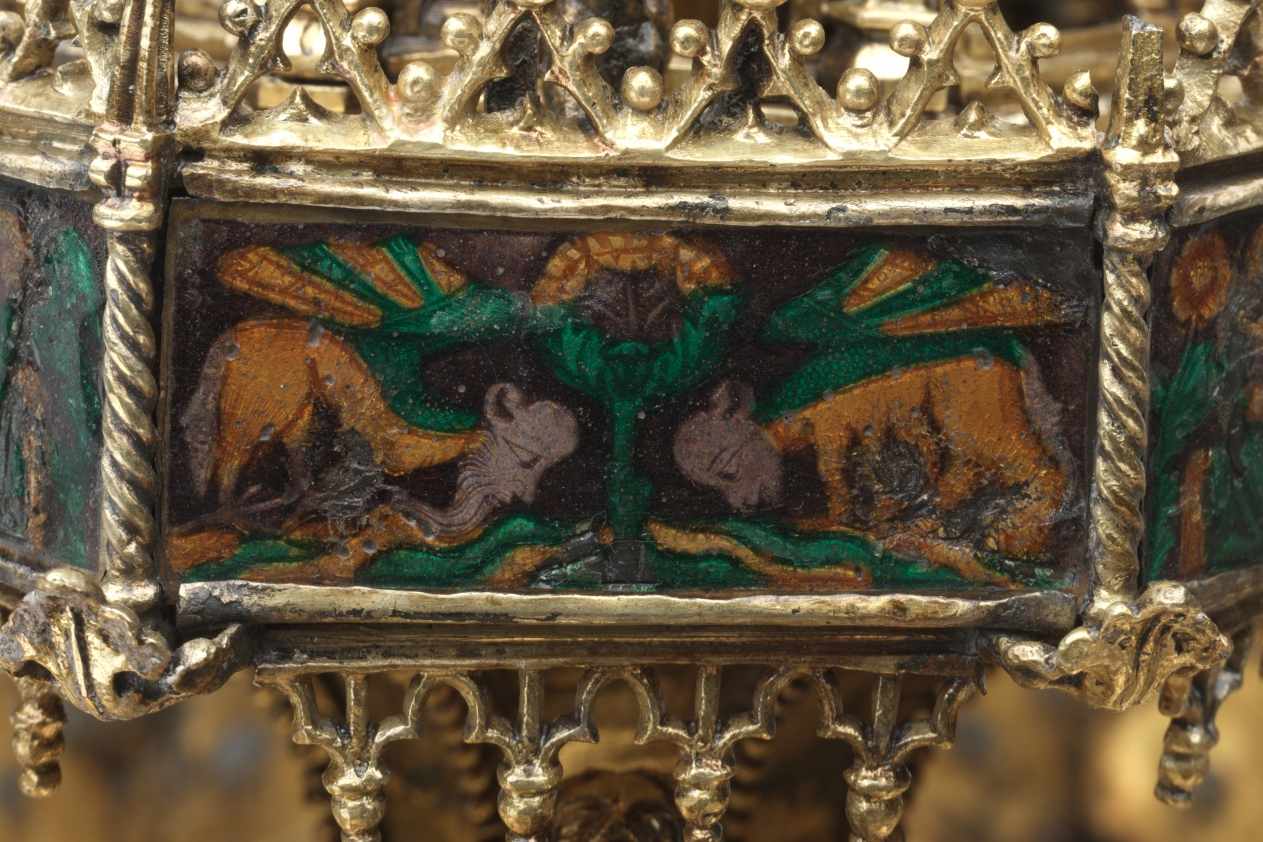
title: Table Fountain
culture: France, Paris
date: c. 1320–40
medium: gilt-silver and translucent enamels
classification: Metalwork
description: Conceptually and stylistically, this object is beyond all else a piece of Gothic architecture in miniature with vaults, pinnacles, columns, and traceried arches. Though the artist who created it is unknown, he was unquestionably inspired by the great Gothic buildings of his time. The table fountain is a three-tiered assembly combining cast elements with bent sheets of gilt-silver. To these have been attached a series of enamel plaques representing grotesque figures, some of which play musical instruments. Water wheels and bells were added to capture motion and sound. The rich detail, precious materials, and involved ornamentation of this deluxe object suggest it would have been expensive to produce and highly treasured by its original owner, someone of high status, and would have been deployed as an object of spectacle. This is the most complete example of its type known to survive from the Middle Ages. Medieval inventories reveal that small fountains like this, often taking various forms, and generally made from precious metals, once existed in large numbers, thus making the Cleveland table fountain an extremely rare object.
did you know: This fountain with its minute architectural details and finely made enamel plaques displayed the wealth and refinement of the owner as it entertained his guests. Imagine hearing the ringing of the tiny bells when this fountain was in use.